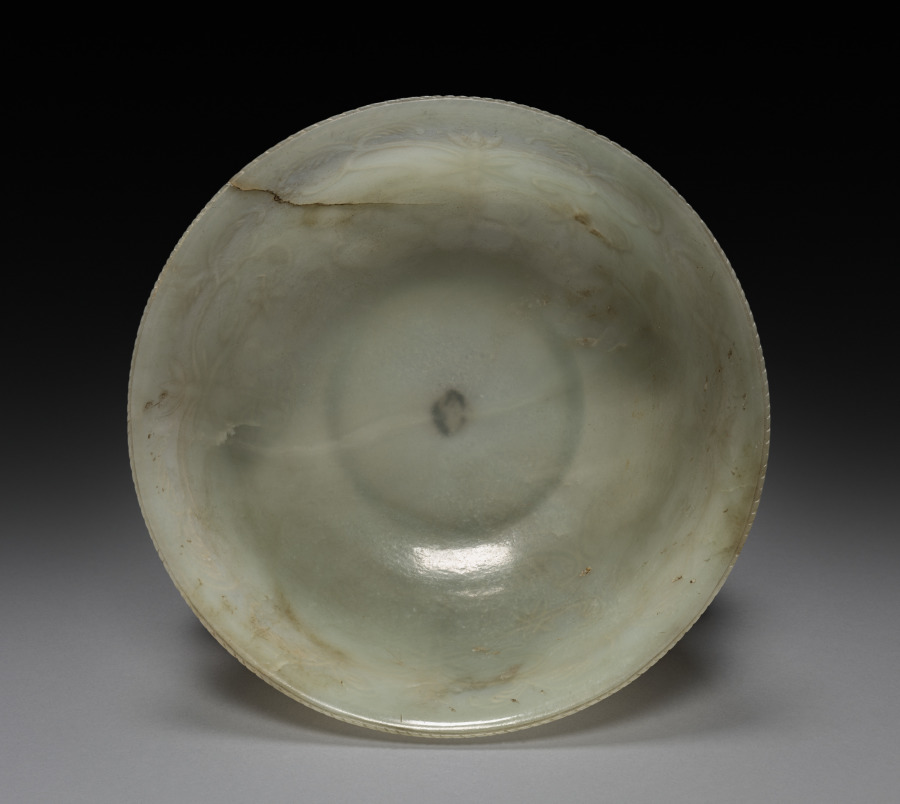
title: Bowl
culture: China, Qing dynasty (1644-1911)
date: 18th Century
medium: jade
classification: Jade